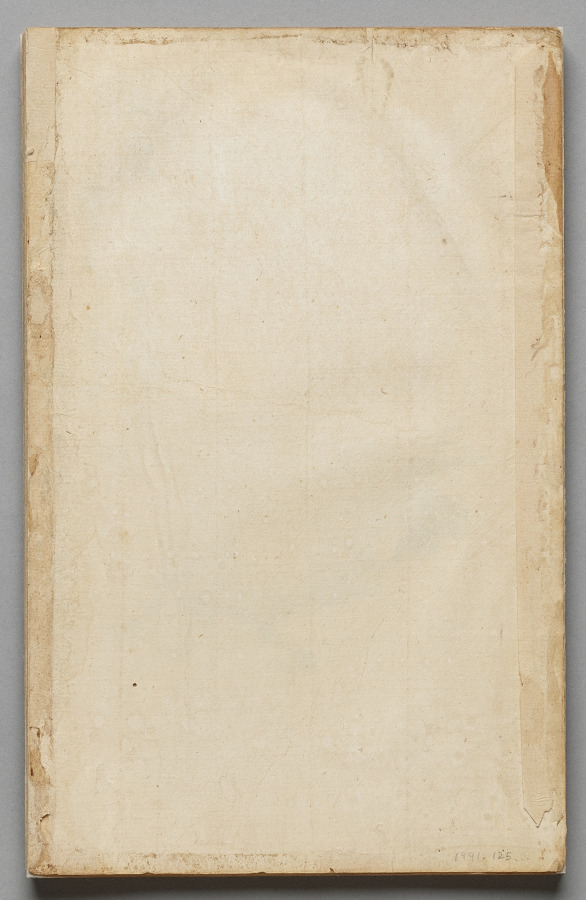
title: Sketch Book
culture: Japan, Edo period (1615–1868) to Meiji period (1868–1912)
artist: Kawanabe Kyōsai (Japanese, 1831–1889)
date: mid- to late 1800s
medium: Accordion-style book of 26 double-leaves; ink and color on paper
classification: Bound Volume